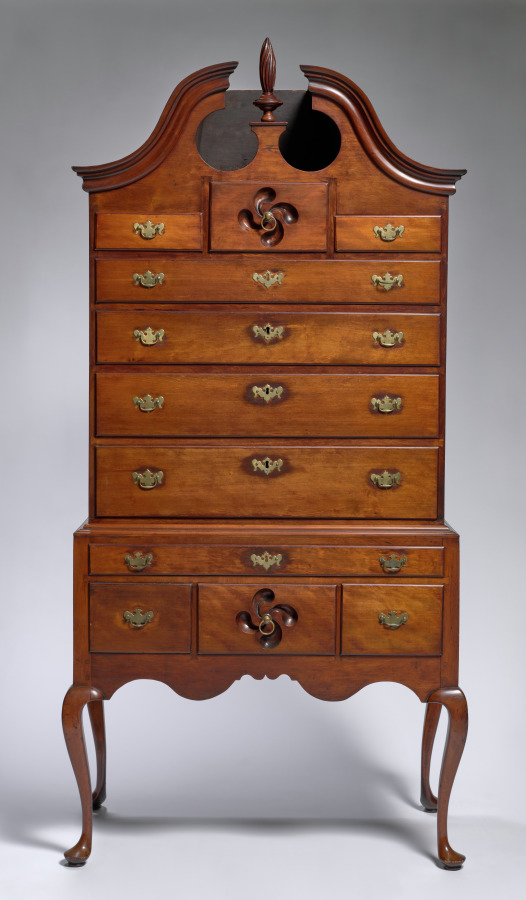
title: High Chest of Drawers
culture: America, Connecticut, 18th century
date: c. 1770–1785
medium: cherry and pine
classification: Furniture and woodwork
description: The style of this chest, generally termed Queen Anne, was introduced into American furniture from England in the first half of the 18th century. Connecticut, however, was a bit behind the times, so this gracefully designed piece was probably made at the time of the Revolution, or slightly later. The chest also features some technical details typical of furniture from this region. It is made of cherry wood that was stained dark. Its surface was also patterned to look like the wood graining of mahogany, the expensive tropical wood that was used when pieces such as this were made in metropolitan centers like Boston or New York.